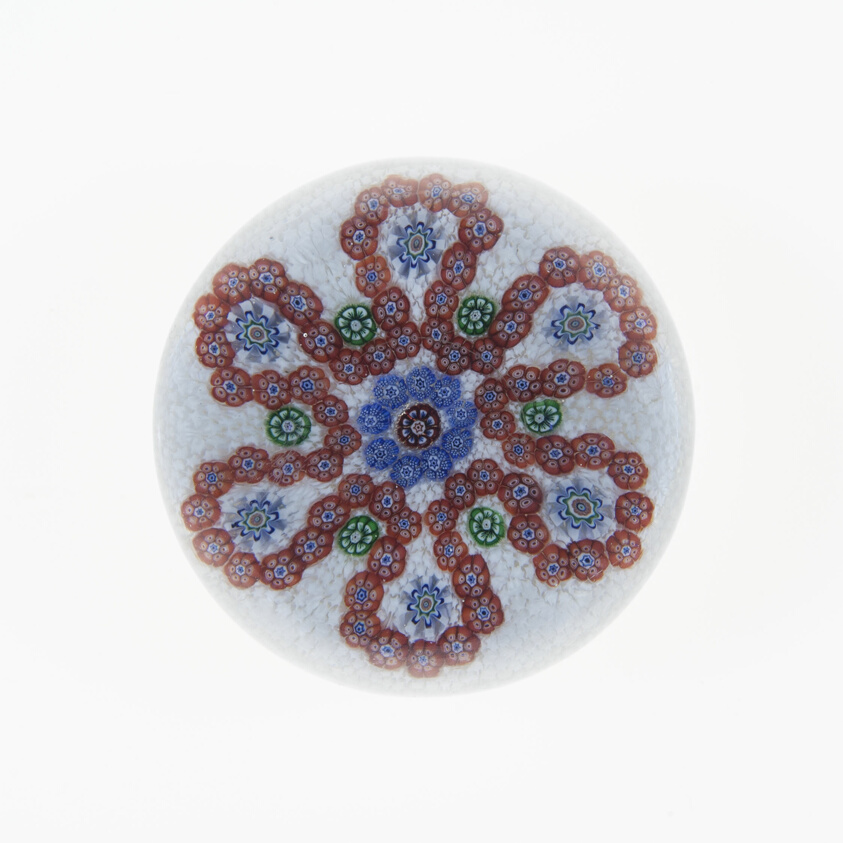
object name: Glass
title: Paperweight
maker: Baccarat Glassworks (Cristalleries de Baccarat); Lorraine, France, founded 1764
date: 19th century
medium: Glass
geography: Baccarat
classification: paperweight; glass